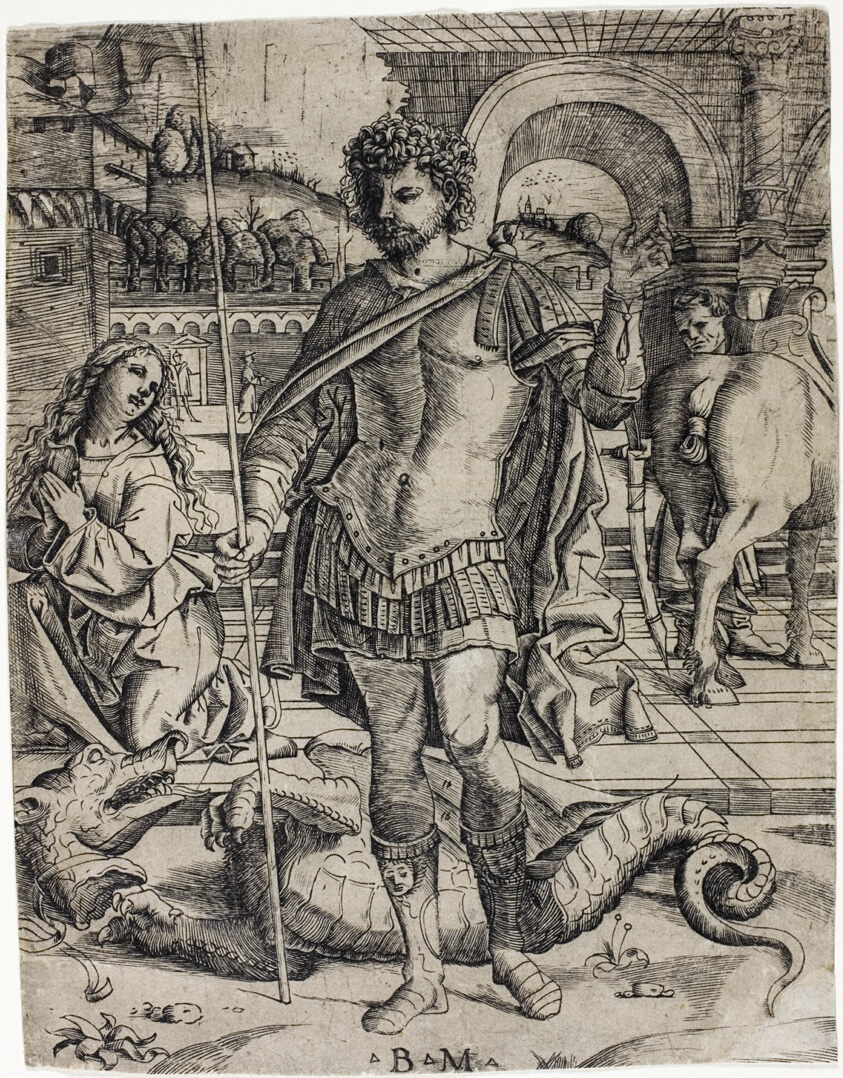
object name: Print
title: Saint George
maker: Benedetto Montagna (Italian, c. 1480-1556/58)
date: 1506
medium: Engraving in black on tan laid paper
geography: Italy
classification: print; prints and drawing